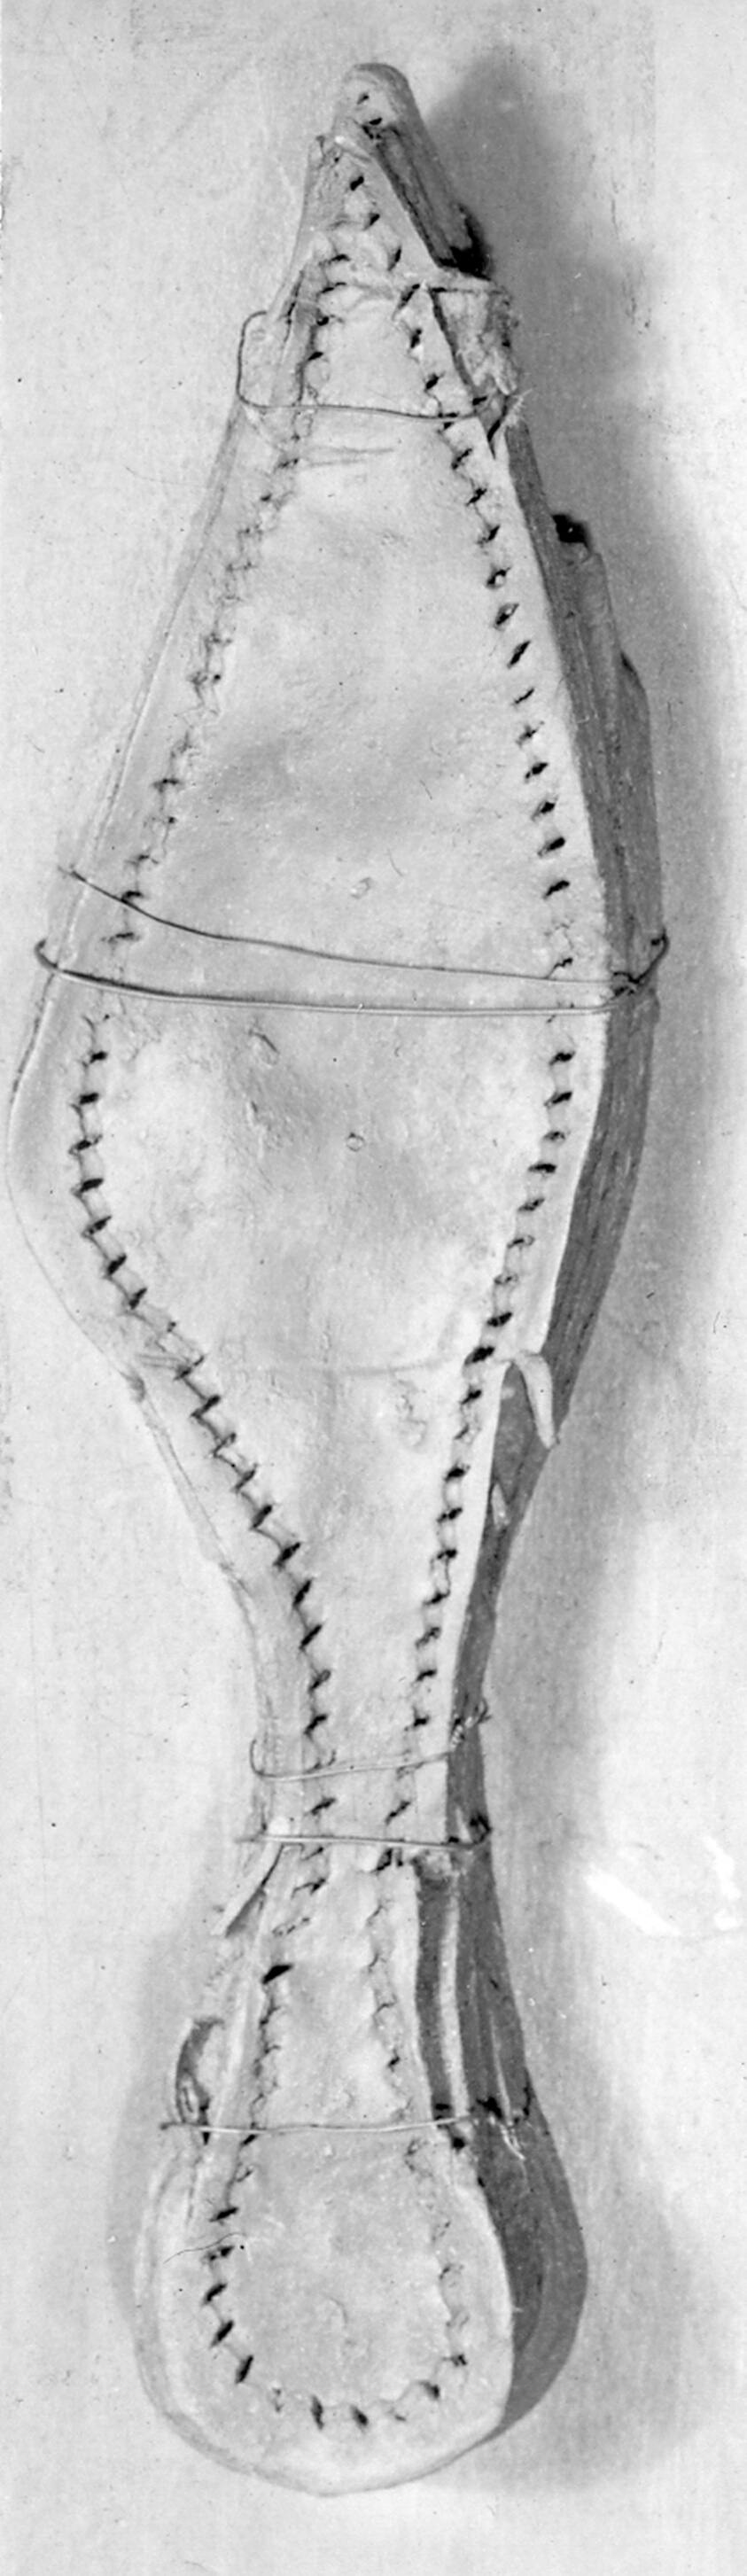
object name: Textile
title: Sole of a Clog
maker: England; Taken from London Wall 1901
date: 15th century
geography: England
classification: textile; shoes - misc; costume accessory - shoe; costume; dress (garment); clothing